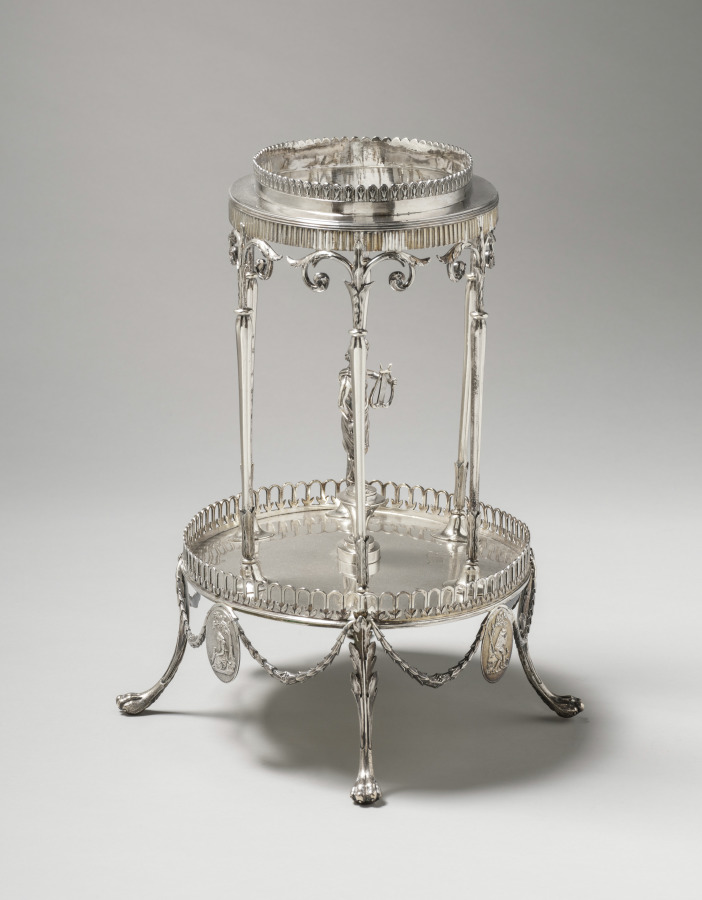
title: Centerpiece (metal stand)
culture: England, 18th century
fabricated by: William Pitts (British)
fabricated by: Joseph Preedy (British)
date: 1792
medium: silver and glass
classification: Silver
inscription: engraved: arms and crest of Bell Coat of arms with Bell impaling Brandling on flat platform.